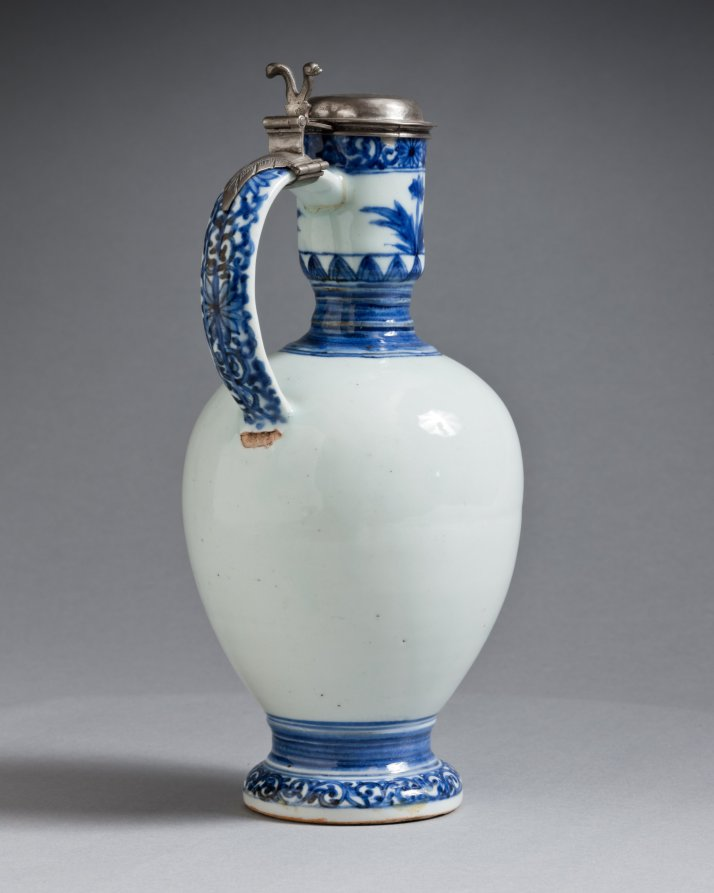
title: Jug with Silver Mounts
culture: Japan, Edo period (1615–1868)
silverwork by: Barent van Leeuwen (Dutch, 1637–1682)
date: c. 1662–76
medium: porcelain with underglaze blue decoration and silver mounts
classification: Ceramic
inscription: [on silver]: town mark for Amsterdam; lion rampant crowned (alloy mark for 0-934 silver); d (date letter for 1666), maker's mark of Barent van Leeuwen.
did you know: The coat of arms on this jug are those of the Valckenier family, active in the Dutch East India Company.